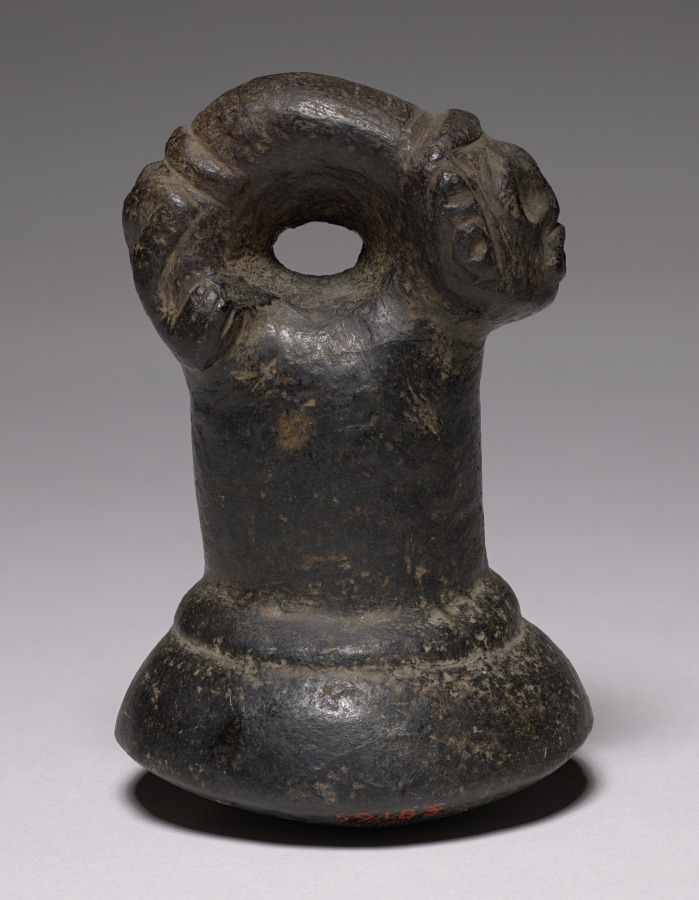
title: Pestle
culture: West Indies, Arawak (?), 15th century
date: 1400s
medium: stone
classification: Sculpture